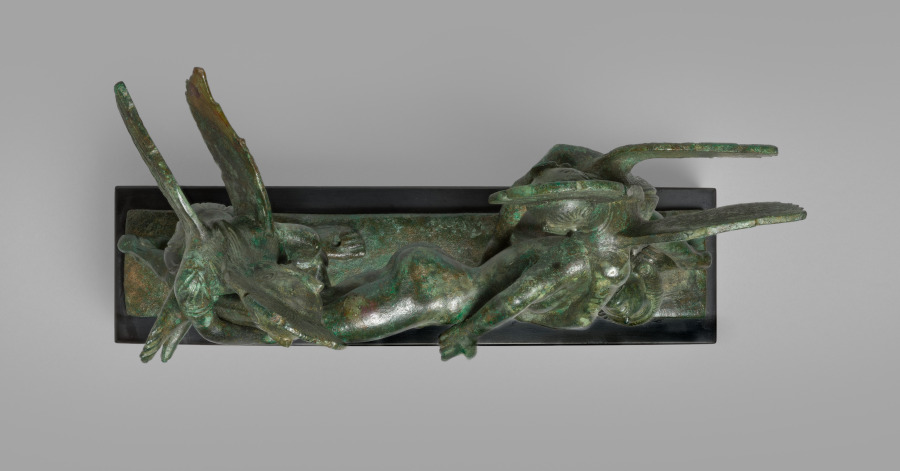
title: Sleep and Death Cista Handle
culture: Etruscan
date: 400–375 BCE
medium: bronze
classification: Sculpture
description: Designed for attachment to the lid of a large bronze cista, a cylindrical lidded box, these three figures probably represent Sleep (Hypnos) and Death (Thanatos) holding the body of Sarpedon. A son of Zeus who helped to defend Troy from invading Greek forces, "godlike Sarpedon of the brazen helmet" fell at the hands of Patroclus, as told by Homer in Book XVI of the Iliad. Apollo then intervened to protect the body, removing it from danger and entrusting it to the two winged deities, as depicted here and in a number of other ancient artworks, Greek and Etruscan alike. If not Sarpedon, the fallen warrior could be Memnon, the son of Eos and Tithonos slain by Achilles.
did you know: These three figures were cast in eight separate pieces, then welded together and attached to the rectangular base.